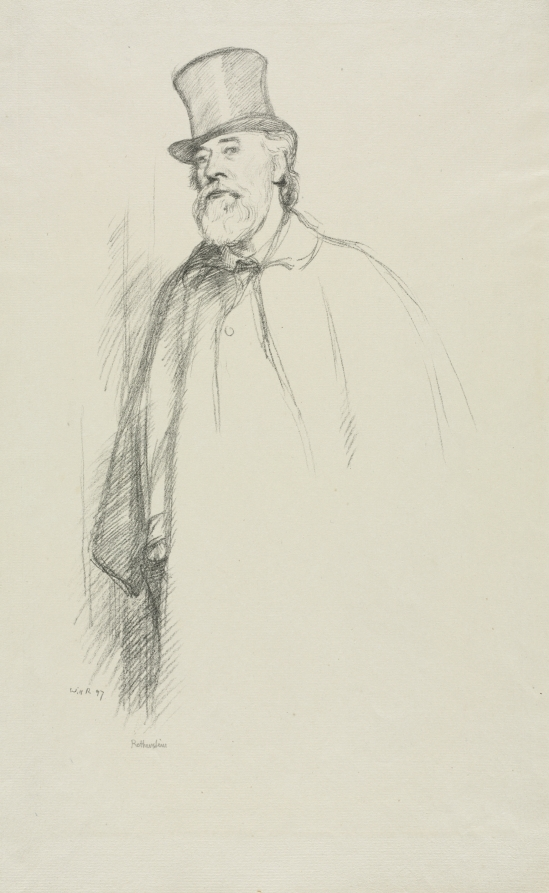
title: Alphonse Legros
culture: England, late 19th Century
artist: William Rothenstein (British, 1872–1945)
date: 1897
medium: lithograph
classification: Print